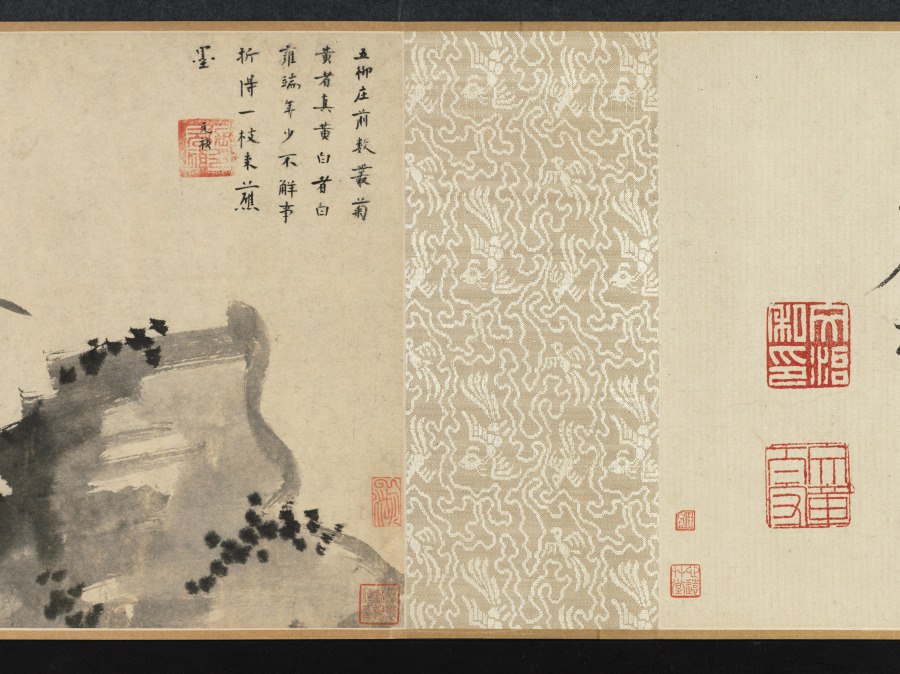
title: Chrysanthemums and Cabbage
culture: China, Ming dynasty (1368–1644)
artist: Tao Cheng (Chinese, active c. 1471–after 1502)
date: c. 1486 or before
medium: handscroll, ink and slight color on paper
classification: Painting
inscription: Artist's seal at beginning of painting: Yun hu 雲湖. Title by Wang Wenzhi 王文治 (1730–1802), date 1756. 2 seals of Wang Wenzhi 王文治 (1730-1802); 3 seals of Ku Yün (n. d.)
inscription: Section A (Chrysanthemums): 1 poem and 1 seal of Zhang Yuanzhen 張元禎 (1437–1507) - Jinshi, 1461; 1 poems and 3 seals of Ni Yue 倪岳 (1444–1501) - Jinshi, 1464; 1 poems and 2 seals of Zhao Xiang 趙祥 (life dates unknown) - Jinshi, 1469; 1 poems and 1 seals of Wu Xixian 吳希賢 (1437–1489) - Jinshi, 1464; 1 poems and 1 seals of Lü Chang 呂㦂 (1449–1511) - Juren, 1471; 1 poems and 3 seals of Fu Han 傅瀚 (1435–1502) - Jinshi, 1464; 1 poems and 1 seals of Feng Jue 馮珏 (life dates unknown) - Jinshi, 1478.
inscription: Chrysanthemums section, poem 1, by Zhang Yuanzhen 張元禎 (1437–1507): Several bushes of chrysanthemums grow in front of the Five-Willow Cottage,/ The yellow ones are really yellow and the white ones white./ This affable and decent fellow, young in years and unsophisticated,/ Has snapped one of the branches to dip in ink. (The Five-Willows Cottage was the home of the poet Tao Qian 陶潛 (Tao Yuanming 陶淵明, AD 365-427).) Chrysanthemums section, poem 2, by Ni Yue 倪岳 (1444–1501): Where at the Eastern Fence can you grieve for the Soul of the Xiang River?/ A man of upright character is mourned within the traces of ink./ White jade with a slight flaw would be a grievance forever,/ Later men should understand why even the roots of the flowers are washed. (Eastern Fence refers again to the poet Tao Qian 陶潛, while the Soul of the Hsiang River refers to the poet Qu Yuan 屈原 (c. 340–278 BC).) Chrysanthemums section, poem 3, by Zhao Xiang 趙祥 (life dates unknown): A clump of chrysanthemum grows in front of the bamboo pavilion,/ The winds of many autumns have blown since we parted beyond the river./ Straining wine through the official's cap of Tao [Qian] to prolong autumn's pleasures,/ The mists and clouds of ten thousand miles belong to the intoxicated. Chrysanthemums section, poem 4, by Wu Xixian 吳希賢 (1437–1489): It is a different spring if mulberry is planted during the latter part of the year,/ The dust of the world originally did not drop on clothing./ Who spills out ink under the Eastern Fence/ And paints so freely this portrait of chrysanthemums for the venerable Sir Tao? Chrysanthemums section, poem 5, by Lü Chang 呂㦂 (1449–1511): This full tray of ink for painting [flowers] at the Eastern Fence;/ Their whiteness or yellowness is not essential in capturing their beauty./ I don't have to go to Jiangnan to see them myself./ At my old house grow two or three branches. Chrysanthemums section, poem 6, by Fu Han 傅瀚 (1435–1502): Who daubed autumn flowers with ink/ As if they were dark dew on a branch tip only vaguely seen at evening?/ After the lazy clouds disperse, no one paints;/ A certain unconventionality pervades this painting. Chrysanthemums section, poem 7, by Feng Jue 馮珏 (life dates unknown): To satisfy his hunger, [the chrysanthemums] have at times entered the poetry of Qu Yuan;/ Taking up the wine cup, it felt close to Tao Qian./ [With them I am like] a lonely root sustained by deep water/ Or an old man to whose hair the color of youth returns.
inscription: Section B (Cabbage): 1 poem and 1 seal of Cai Qi 蔡圻 (life dates unknown) - degree information not known; 1 poems and 3 seals of Ni Yue 倪岳 (1444–1501) - Jinshi, 1464; 1 poem and 3 seals of Jiao Fang 焦芳 (1436–1517) - Jinshi, 1464; 1 poem and 3 seals of Li Dongyang 李東陽 (1447–1516) - Jinshi, 1464; 1 poems and 1 seals of Wu Xixian, signed “Xixian” 吳希賢 - Jinshi, 1464; 1 poems and 3 seals of Fu Han 傅瀚 (1435–1502) - Jinshi, 1464; 1 poems and 1 seals of Lü Chang 呂㦂 (1449–1511) - Juren, 1471; 1 poems and 2 seals of Zhao Xiang 趙祥 (life dates unknown) - Jinshi, 1469; 1 poems and 1 seals of Feng Jue 馮珏 (life dates unknown) - Jinshi, 1478.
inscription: Cabbage section, poem 1, by Cai Qi 蔡圻 (life dates unknown): The ink splashes are fresh from a frosty brush dipped in pond water;/ I can visualize that time when Yunhu 雲湖 [Tao Cheng] first showed his talents./ I lament the places where I scribbled before,/ Who would open them to inscribe a poem? (The first line is an allusion to the famous Jin dynasty calligrapher Wang Xizhi 王羲之 (AD 303-361), who practiced calligraphy so diligently at the edge of a pond that the water turned black with ink.) Cabbage section, poem 2, by Ni Yue 倪岳 (1444–1501): After rain the vegetables begin to grow;/ How are the colors of the masses lately!/ Once you get used to them, the tastiest parts are the ends of the roots;/ I don't know if they can be used for "seasoning soup." ("Seasoning soup" is an allusion to the statesmanship of a chief minister.) Cabbage section, poem 3, by Jiao Fang 焦芳 (1436–1517): This crop of purple stalks and green leaves is late and irregular;/ Now the rainy season is over for the Eastern Garden./ All the nobles nowadays dine on meat;/ Who of them knows the flavor of this [cabbage]. Cabbage section, poem 4, by Li Dongyang 李東陽 (1447–1516): It's always helped the honest man to sober up after drinks./ I intend to go to the deepest part of the stream-crossed garden/ To refresh myself in the fragrance and dew of evening. Cabbage section, poem 5, by Wu Xixian 吳希賢 (1437–1489): After rain, the white silk is filled with fragrant vegetables;/ How many times this happens in Mr. Tao's paintings./ On whom will you depend to present a memorial to the ruler?/ Don't let this color emerge on the faces of the people. (The last line is meant as a warning to officials: the color of the vegetables (green) may be pleasing in itself, but when it emerges on the faces of the starving poor, it signifies a badly governed world.) Cabbage section, poem 6, by Fu Han 傅瀚 (1435–1502): For twenty years I have feasted on the excellent mutton of an official;/ Yet I talk and dream about the garden and its vegetables./ Do not merely say it is good to chew the root of the cabbage--/ You must taste to understand what poverty is. Cabbage section, poem 7, by Lu Chang 呂㦂 (1449–1511): The capital is never a place for an apprentice in the "garden of scholarship."/ Who would write about gardens and vegetables on an examination paper?/ I've walked throughout the country in spring;/ Make sure the people don't show this color. Cabbage section, poem 8, by Zhao Xiang 趙祥 (life dates unknown): After a wash of rain, the spring garden is still in order;/ The flavor [of the cabbage] is more suitable with a small drink and the hum of a tune./ The rich and powerful in their mansions consume dish after dish of meat;/ Vegetarian food is known only by the scholars. Cabbage section, poem 9, by Feng Jue 馮珏 (life dates unknown): A new cabbage is nourished with dew;/ It takes a long time to grow and mature./ The business of "seasoning the soup" is your responsibility;/ Better command the gardener to take care [of the cabbages]. trans. HK/LYSL/WKH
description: On an autumn day in Beijing, Tao Cheng had a gathering with a group of scholar-officials and created two paintings in a spontaneous, casual style. The first depicts chrysanthemums, slender bamboo stalks, and a rock in monochrome ink. Tao applied light colors for the second painting that depicts cabbage. Tao deliberately placed the images on the first sections of the paper so that his honorable guests could add their poetic inscriptions inspired by his imagery. In the first section to the right, all seven poetic inscriptions refer to the beloved poet and recluse Tao Qian (also called Tao Yuanming, AD 365–427) who was particularly known for his profound love for chrysanthemum flowers. Most of the inscriptions in the second section express sympathy for the poor, since cabbage is the main ingredient in their humble food. Taken together, the poems and paintings allude to the life and responsibilities of the scholar-official: the importance of both an upright character and a concern for the poor citizens in order to achieve good government.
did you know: Eminent calligrapher Wang Wenzhi 王文治 was only 27 sui when he wrote the title in 1756.